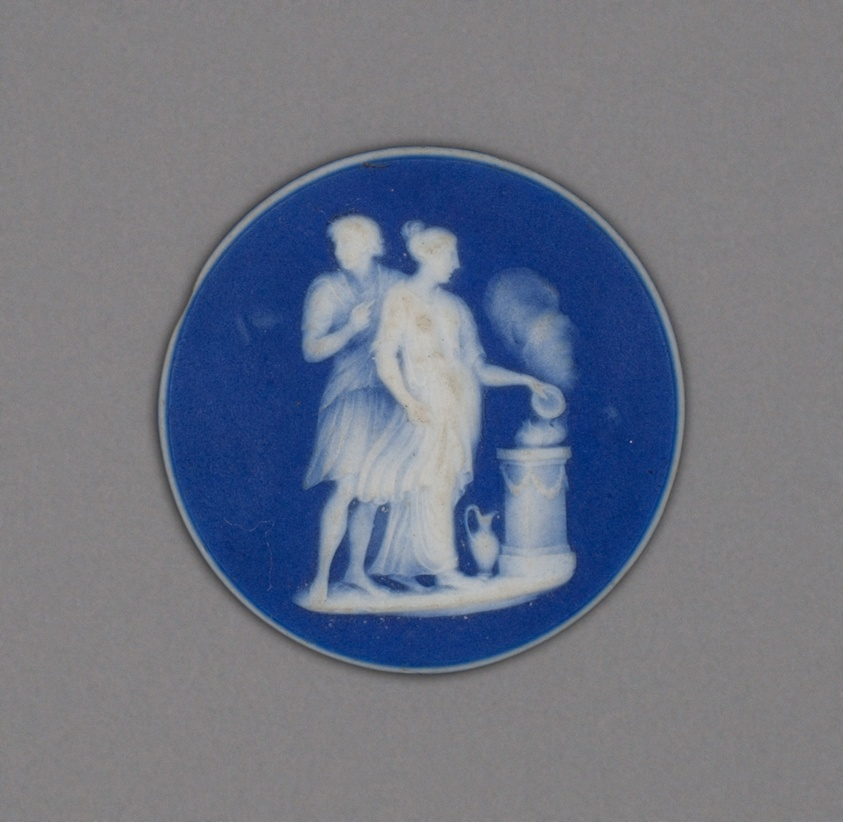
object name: Ceramics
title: Cameo with Sacrifice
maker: Wedgwood Manufactory (England, founded 1759)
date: Late 18th century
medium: Stoneware (jasperware)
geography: Burslem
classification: cameo (sculpture); sculpture; stoneware; european decorative arts; ceramics